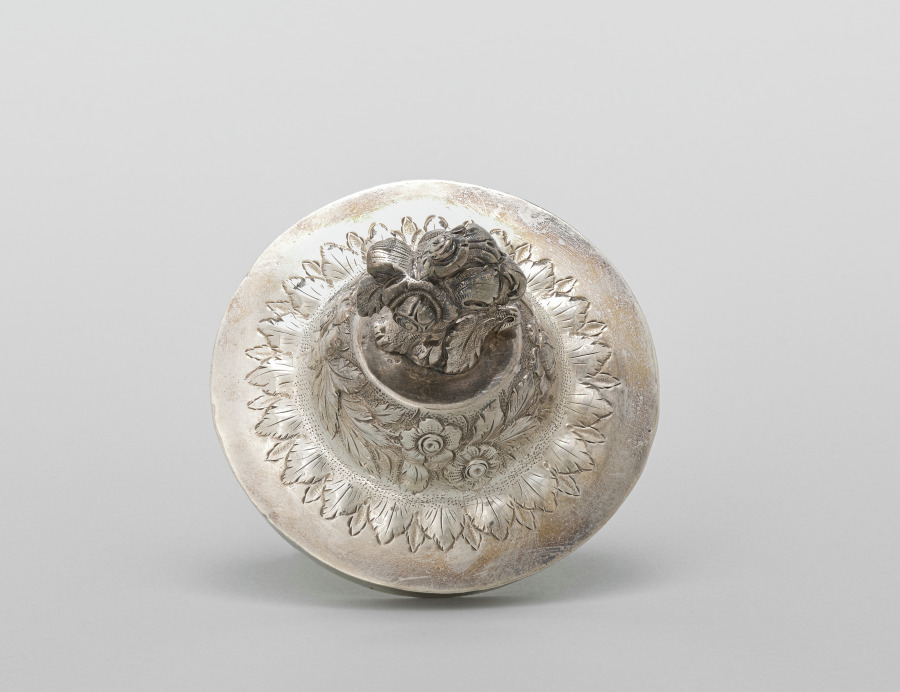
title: Cover for a Coffee Urn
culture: America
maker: Samuel Kirk (American, 1793–1872)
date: c. 1843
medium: Silver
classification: Silver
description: Samuel Kirk was a leading American silversmith in the early 19th century whose Baltimore studio had became a major American silver company that thrived throughout the middle of the 20th century. This cover is part of a large, impressive coffee urn. This highly decorated example was considered the ultimate in Samuel Kirk silver and was largely made by hand.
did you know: The decoration on this coffee urn was achieved through a technique known as "repoussé" in which the design was hammered into relief from behind.